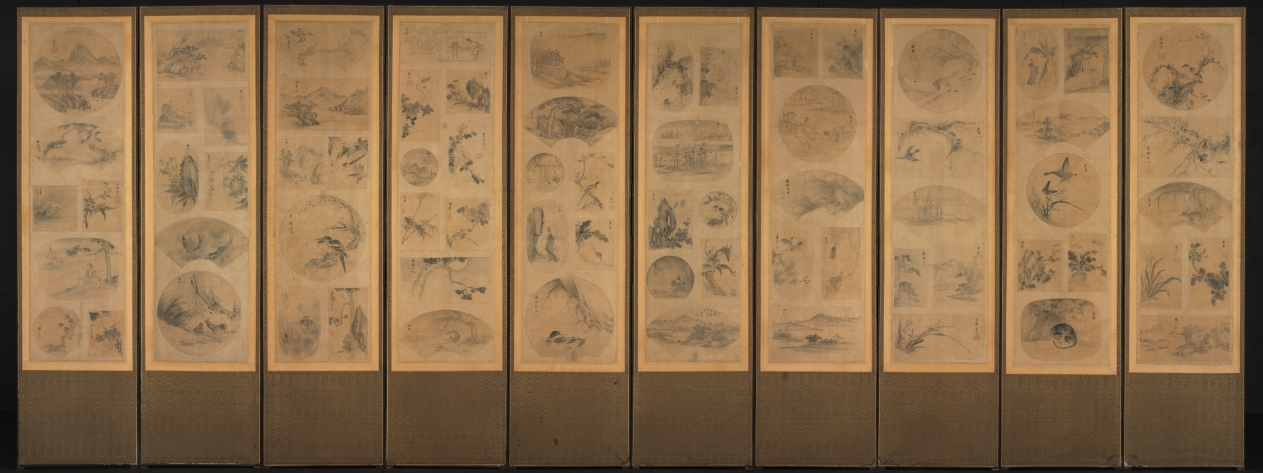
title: Painting of One Hundred Themes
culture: Korea, Joseon dynasty (1392–1910)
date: late 1800s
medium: Ten-panel folding screen affixed with album leaves (obverse), calligraphy (reverse), ink and color on silk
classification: Painting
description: The front of this screen features an assortment of subjects: birds and flowers, landscapes, and scenes of everyday life, mostly in monochromatic ink with light colors. The screen’s reverse side conveys a number of classical poems about the fleeting beauty of the four seasons. Traditionally, only one side of a folding screen bears painted or embroidered images, since these were used as a background furnishing. In Korean houses by the 1800s and early 1900s, however, two-sided folding screens became noticeably popular, possibly inspired by Japanese double-sided folding screens, which mainly served as room dividers in Japanese households.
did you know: The way of displaying small images of various subjects became one of the most popular type of painting toward the end of the 19th century.